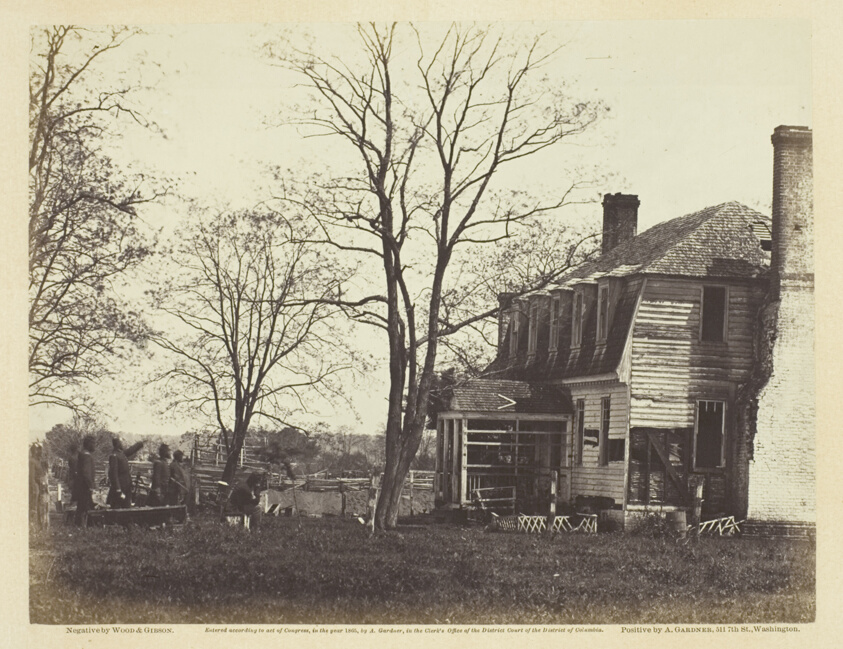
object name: Photograph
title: Moore House, Yorktown, Virginia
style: 19th century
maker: Wood and Gibson (American, active 19th century)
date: May 1862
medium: Albumen print, pl. 15 from the album "Gardner's Photographic Sketch Book of the War, vol. 1" (1866)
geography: United States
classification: albumen silver print; photographic process; photography; photograph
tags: Collected by Hugh Edwards, Gardner's Photographic Sketch Book